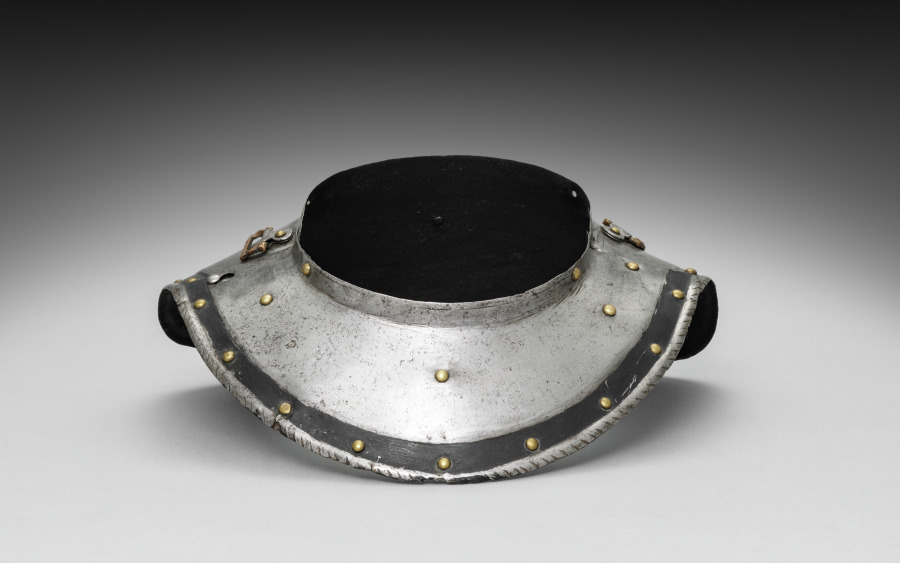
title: Colletin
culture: Germany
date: c.1550–1570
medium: iron, steel, leather and brass rivets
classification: Arms and Armor